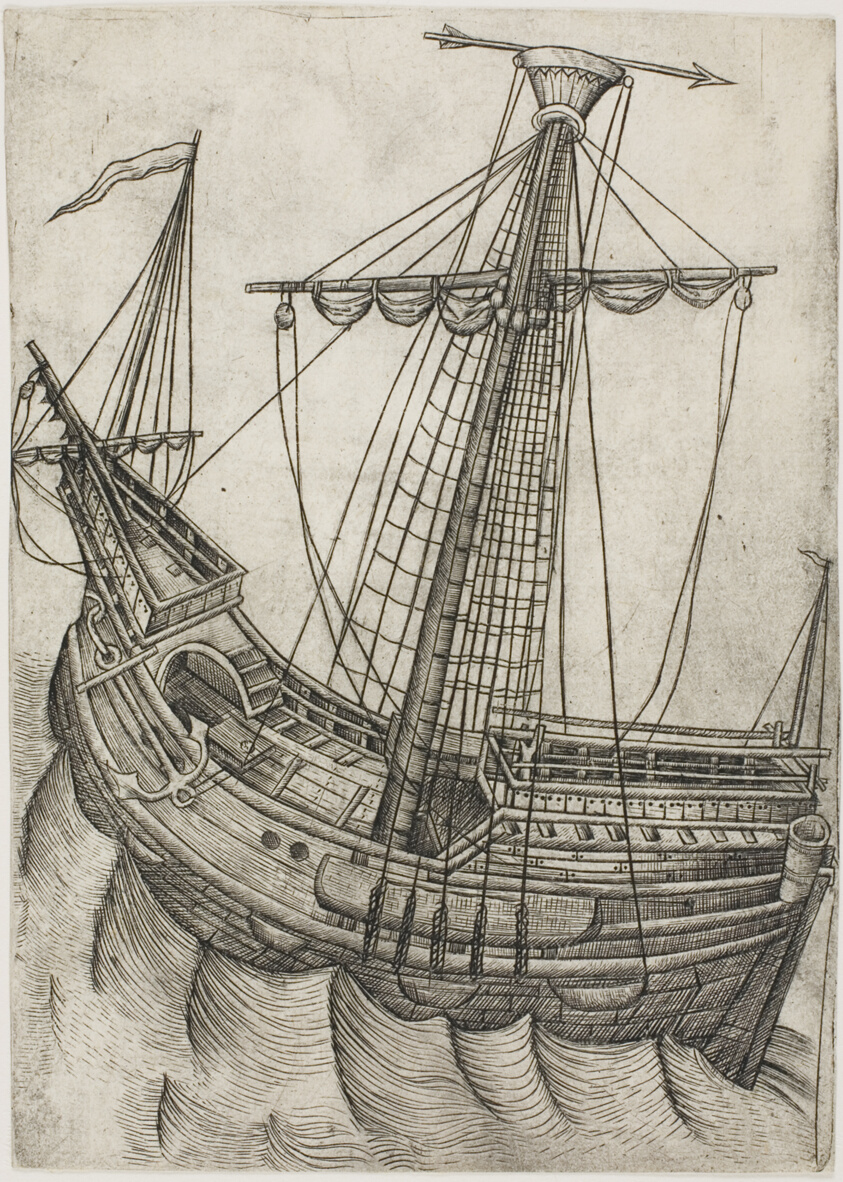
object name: Print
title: Ship with Sails Furled and Arrow Pointing to the Right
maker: Master W with the Key (Netherlandish, active 1464-1485)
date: 1475/85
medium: Engraving on cream laid paper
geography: Netherlands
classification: engraving; print; prints and drawing